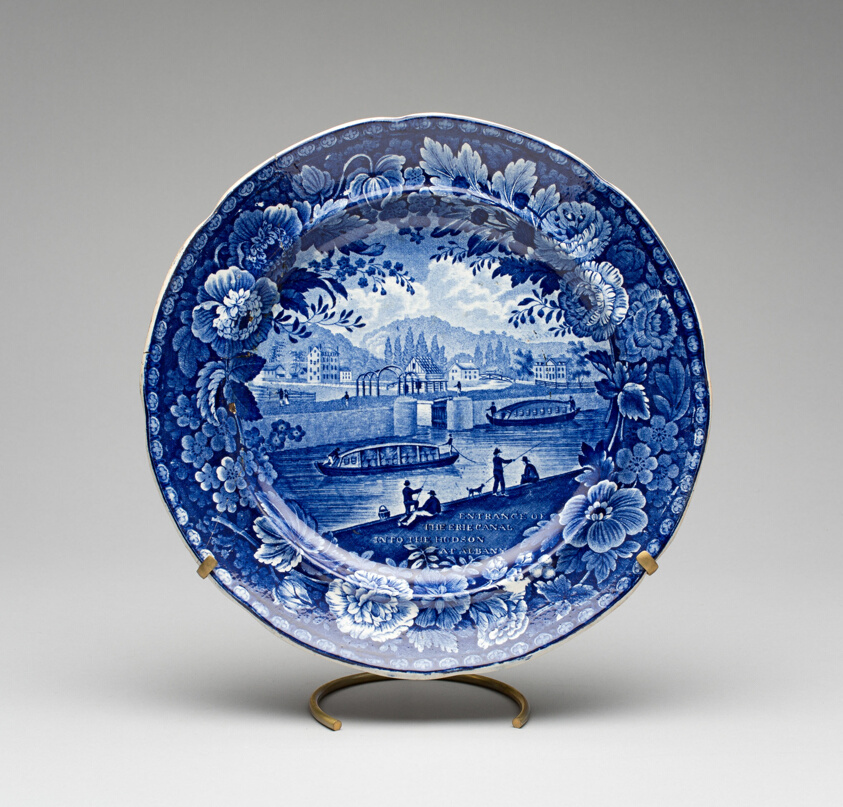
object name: Decorative Arts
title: Plate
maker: Enoch Wood & Sons; English, active 1818–1846; Made for the American market; Staffordshire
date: 1790–1818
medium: Earthenware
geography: Burslem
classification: earthenware; american decorative arts; ceramics; decorative arts